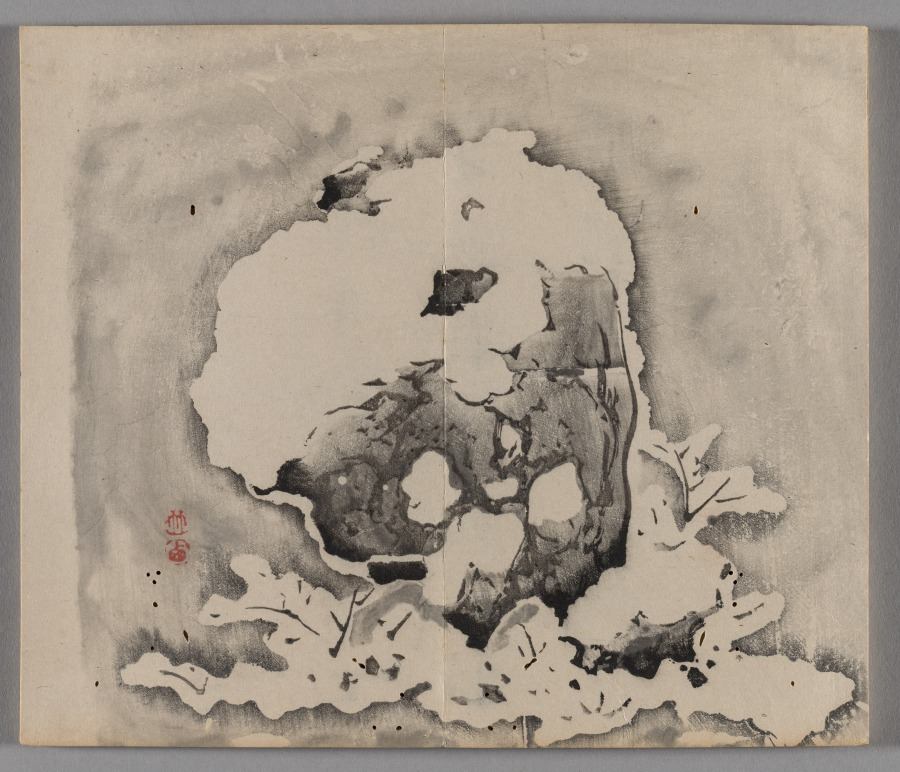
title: Ten Bamboo Studio Painting and Calligraphy Handbook (Shizhuzhai shuhua pu): Rocks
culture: China, Qing dynasty (1644-1911)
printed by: Hu Zhengyan (Chinese, c. 1584–1674)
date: 1633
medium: Woodblock-printed book; ink and colors on paper; first edition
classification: Print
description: Color printing reached a level of perfection in the early 1600s, as seen in this Ten Bamboo Studio Collection of Calligraphy and Painting and the Mustard Seed Garden Manual of Painting (printed 1679 and 1701). The painterly quality, precision in registering (aligning) the woodblocks, and harmonious colors made them the most successful color print editions in Chinese history. Both editions were printed and compiled in Nanjing, spread nationwide, and had a great impact on the arts in Japan and Korea.